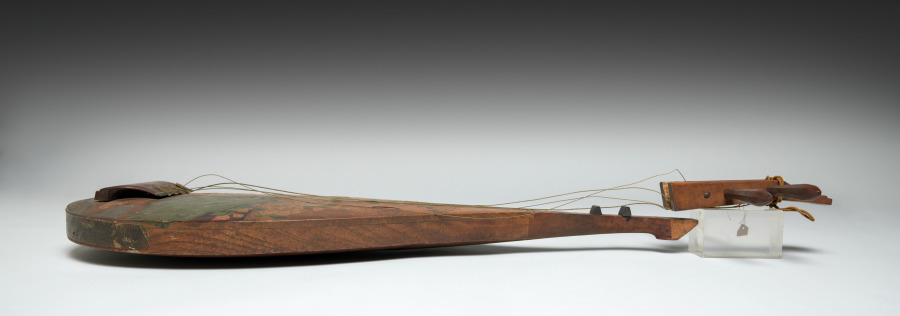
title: Bugaku Biwa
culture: Japan, Edo period (1615–1868)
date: early to mid-1800s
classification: Musical Instrument